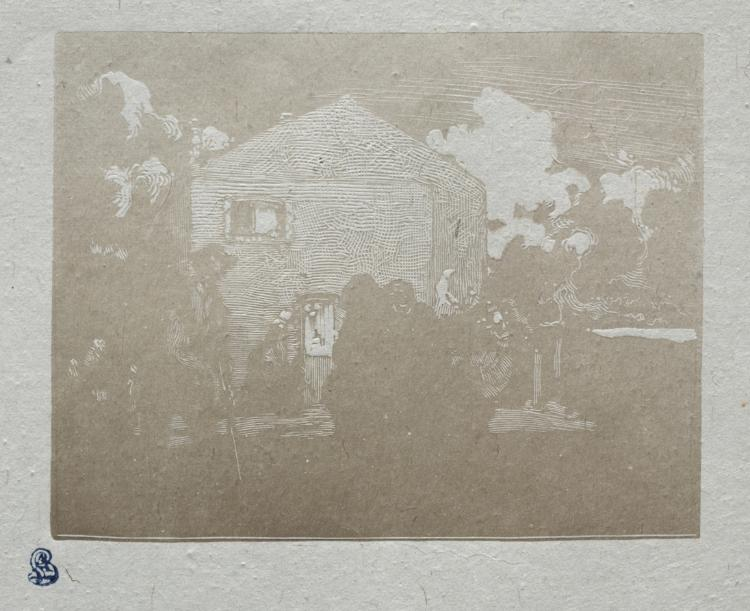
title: The Beggars at the Last House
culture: France, late 19th-early 20th Century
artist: Auguste Louis Lepère (French, 1849–1918)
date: 1905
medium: wood engraving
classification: Print